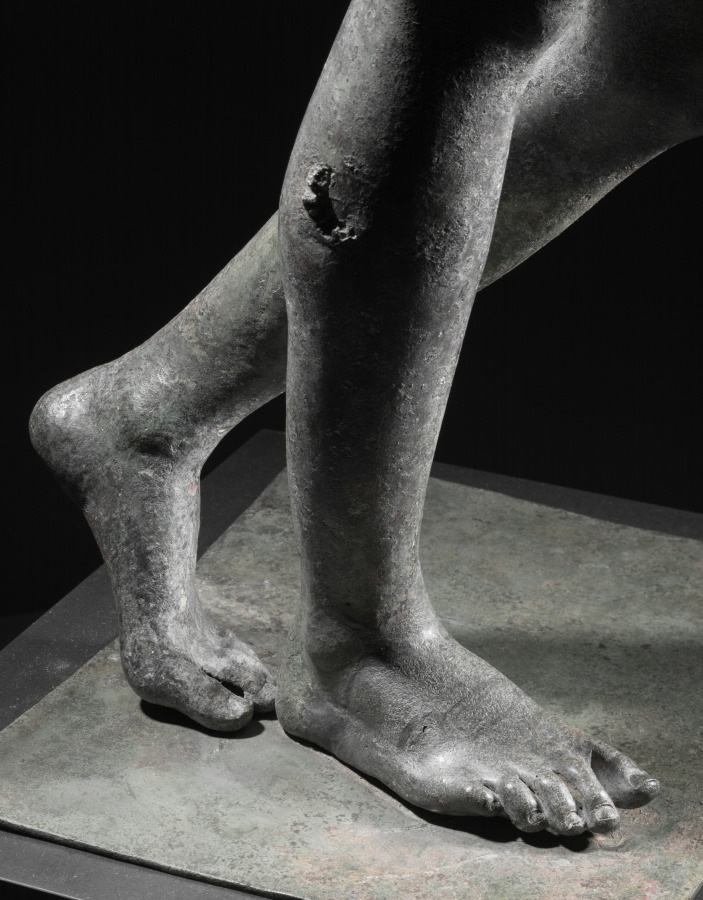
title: Baseplate for the Cleveland Apollo: Apollo Sauroktonos (Lizard-Slayer) or Apollo the Python-Slayer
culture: Greece, Athens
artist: possibly by Praxiteles (Greek, Athenian, c. 400–330 BCE)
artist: or Follower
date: c. 350–200 BCE, or possibly later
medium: bronze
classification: Sculpture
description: The baseplate is nearly square in shape, but two edges are noticeably concave. A modern hole facilitates mounting (with a modern rod in the right leg), and marks show the placement of both feet, once attached with lead solder. A nearly circular lead solder mark located at the front left corner likely corresponds to the placement of a small tree, now lost.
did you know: Most large-scale ancient bronze sculptures stood on bases made of stone rather than bronze.